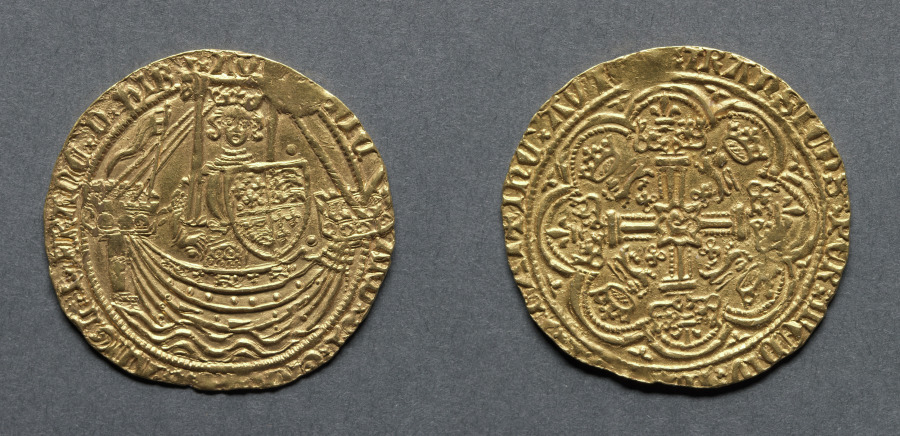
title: Noble: Richard II Standing on Ship with Shield of Arms (obverse); Ornamental Cross with Lis Terminals (reverse)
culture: England, Richard II, 1377-1399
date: 1377–1399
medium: gold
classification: Coins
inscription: RICARD DI GRA REX ANGLE Z FRANC D HIB Z AQ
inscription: IHC. AVTEM TRANSIENS PER MEDIV. ILLORVM IBAT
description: This type of coin is very similar to that of the last right but a flag or pennant has appeared on the stern-castle of the ship. This signifies that the piece was struck in the Calais mint, then, and for 180 years to come, an English possession. There are three other points of interest in the Nobles of this period. First some of the early pieces of the reign were struck from the dies of the previous king, Edward III. Secondly, a symbol, such as a lion, trefoil or crescent was sometimes placed on the ship's rudder. Fours such marks were used, their purpose being to distinguish different issues. Finally, four styles of lettering were used.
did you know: Richard II was king of England from 1377 until 1399 and was the subject of a play by William Shakespeare.